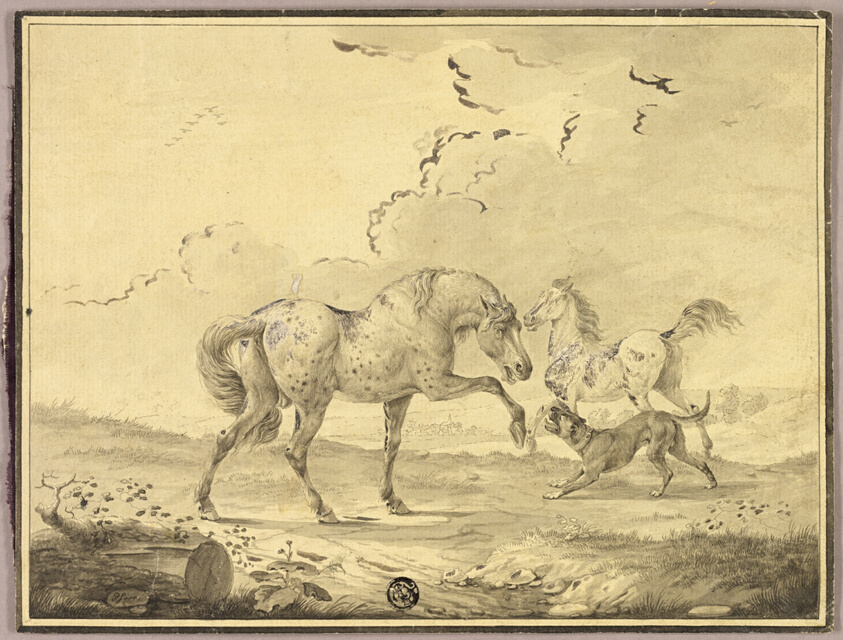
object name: Drawing and Watercolor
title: Two Horses Fighting Dog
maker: Johann Georg Pforr (German, 1745-1798)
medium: Pen and gray ink, with brush and gray and brown wash, heightened with lead white (discolored), on cream laid paper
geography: Germany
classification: ink or chalk wash; drawings (visual works); prints and drawing